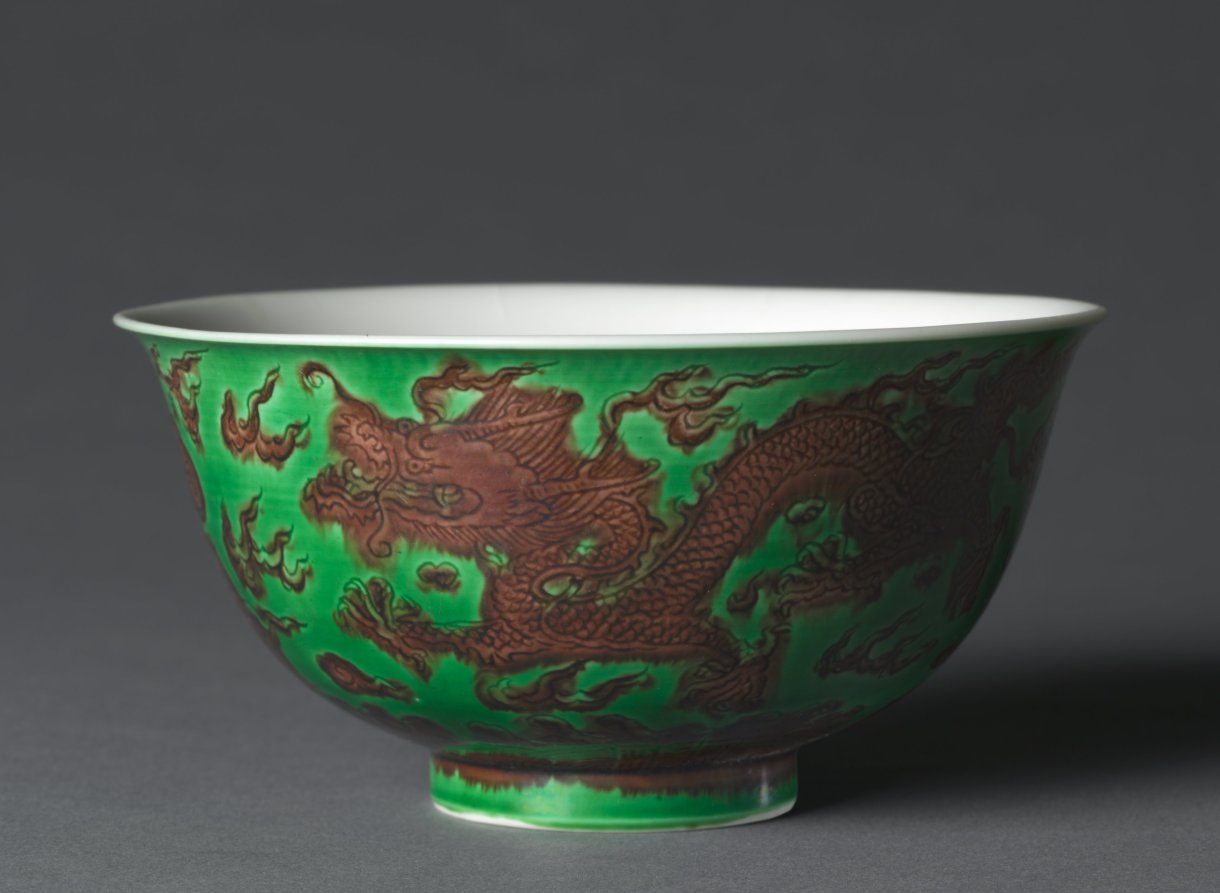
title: Bowl with Dragons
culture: China, Jiangxi province, Jingdezhen kilns, Qing dynasty (1644-1911), Kangxi mark and reign (1662-1722)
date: 1662–1722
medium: porcelain with incised and enamel decoration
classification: Ceramic